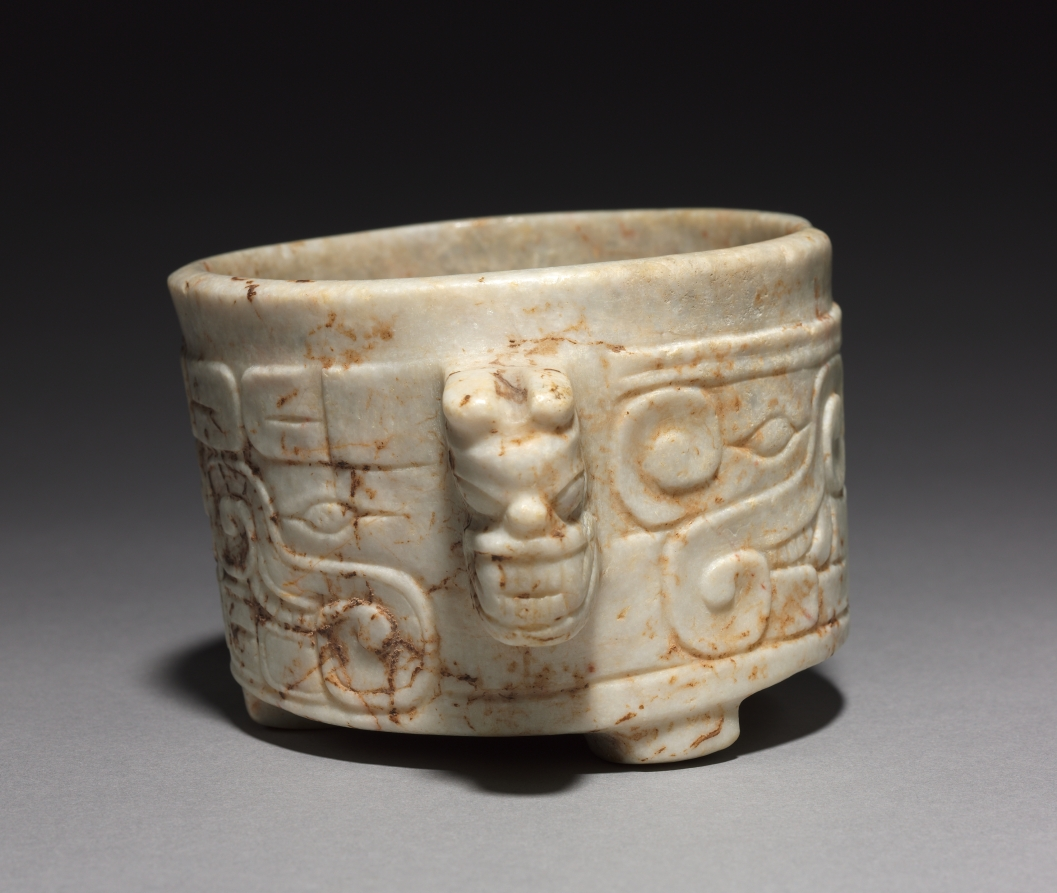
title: Tripod Bowl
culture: Honduras, Ulúa Valley, 7th-10th century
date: 600–1000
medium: marble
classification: Sculpture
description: Between about 600 and 800, white marble vessels carved in dense relief on their outer surfaces were a form of luxury and wealth in the Ulúa region of Honduras. Two confronting profile zoomorphic heads occur on each side of this example, between three-dimensional handles shaped as bat heads. Originally the vessel may have been covered with stucco and brightly painted.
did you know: One of two vessels that were the first ancient American artworks collected by James and Florence Gruener.